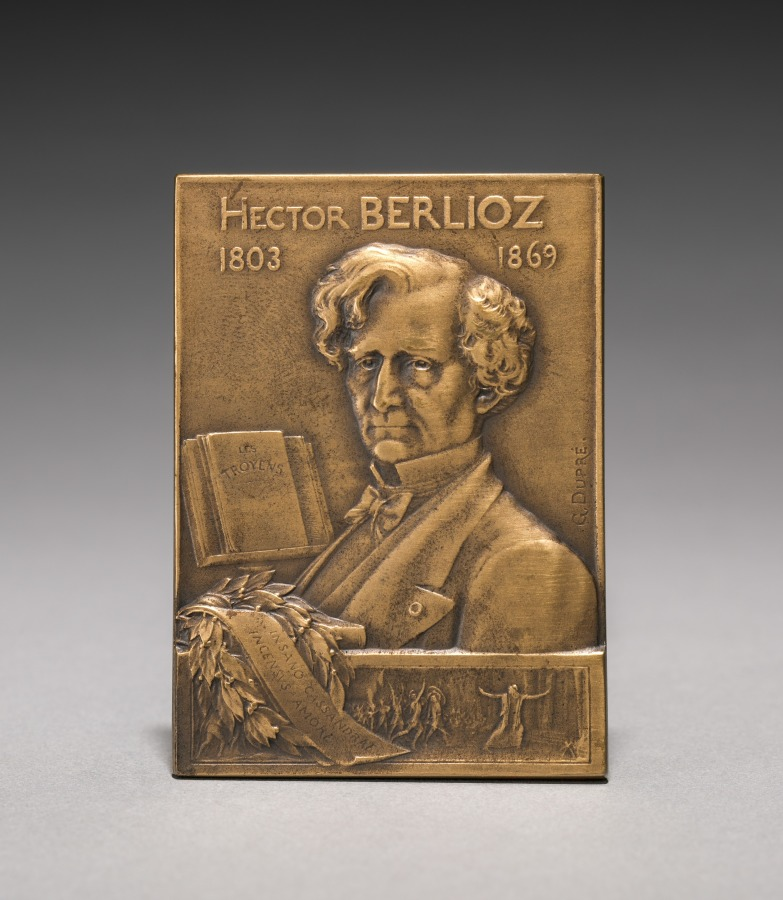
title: Medallion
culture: France, early 20th century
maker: Georges Dupré (French, 1869-1909)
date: 1903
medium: bronze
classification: Plaque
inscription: "Grenoble et la côte-saint-andré à Hector Berlioz"; signed: "G. Dupré."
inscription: INSANO CASSANDRAE INCENSUS AMORE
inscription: Les Troyens